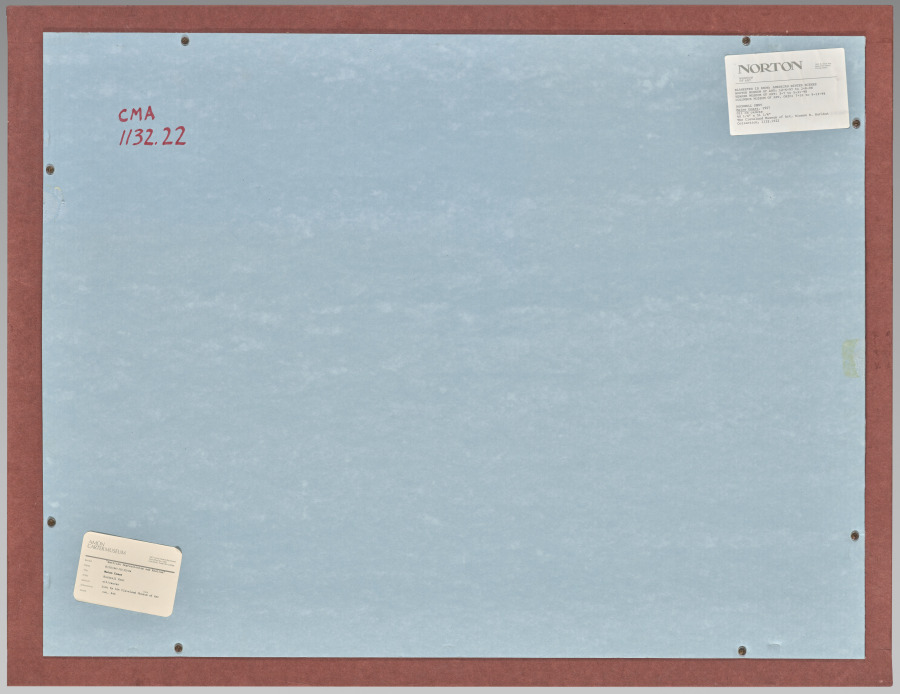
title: Maine Coast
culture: America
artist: Rockwell Kent (American, 1882–1971)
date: 1907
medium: oil on canvas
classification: Painting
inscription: signed lower left: Rockwell Kent / 1907.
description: Located off the coast of Maine, Monhegan Island has long drawn artists attracted to its rugged headlands, brooding forests, and dramatic ocean vistas. Unlike most colleagues who visited during summer, Kent built a home and lived there year-round, working as a well digger, lobsterman, and carpenter from 1906–8. This boldly rendered winter scene was painted from his studio window.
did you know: Kent loved to paint landscapes in cold, remote areas, including Maine, Alaska, Newfoundland, and Greenland.